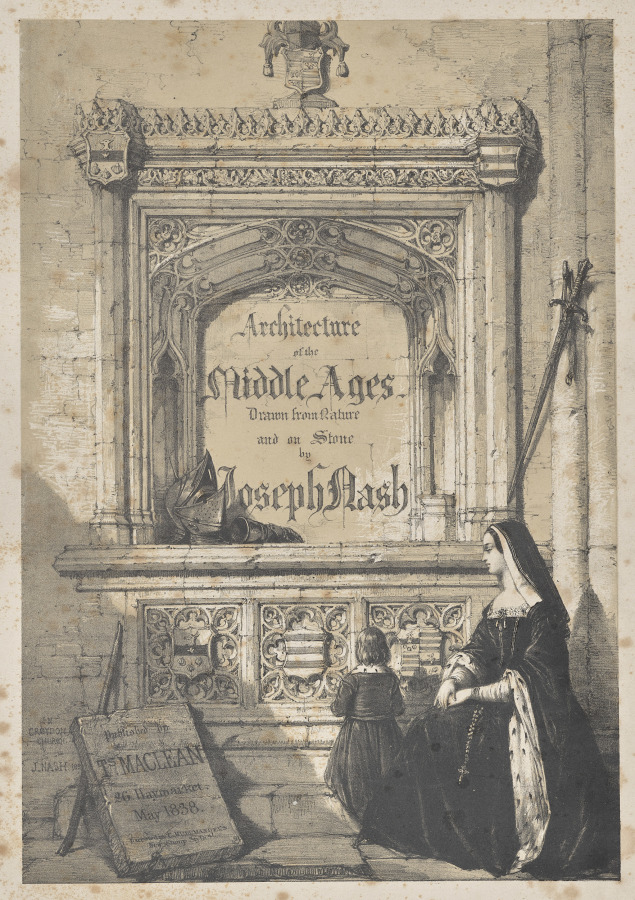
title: Architecture of the Middle Ages: Title Page - In Croyden Church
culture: England, 19th century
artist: Joseph Nash (British, 1808–1878)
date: 1838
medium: lithograph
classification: Print